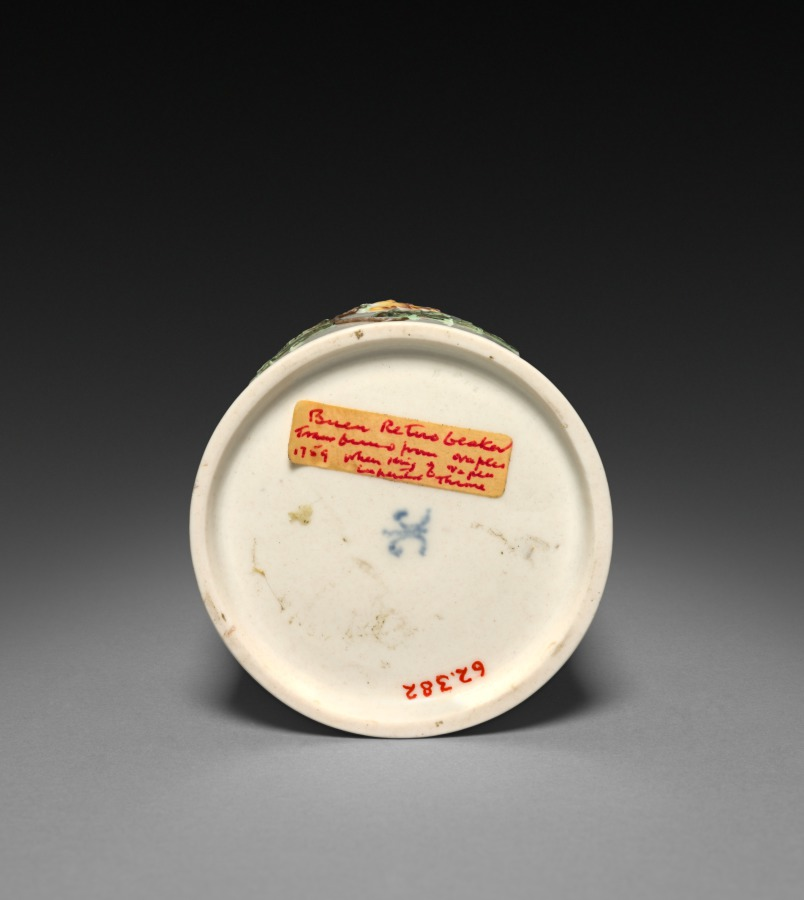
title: Beaker-Shaped Vessel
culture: Italy, Naples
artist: Capo di Monte Factory (Italian)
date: c. 1745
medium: porcelain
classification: Ceramic